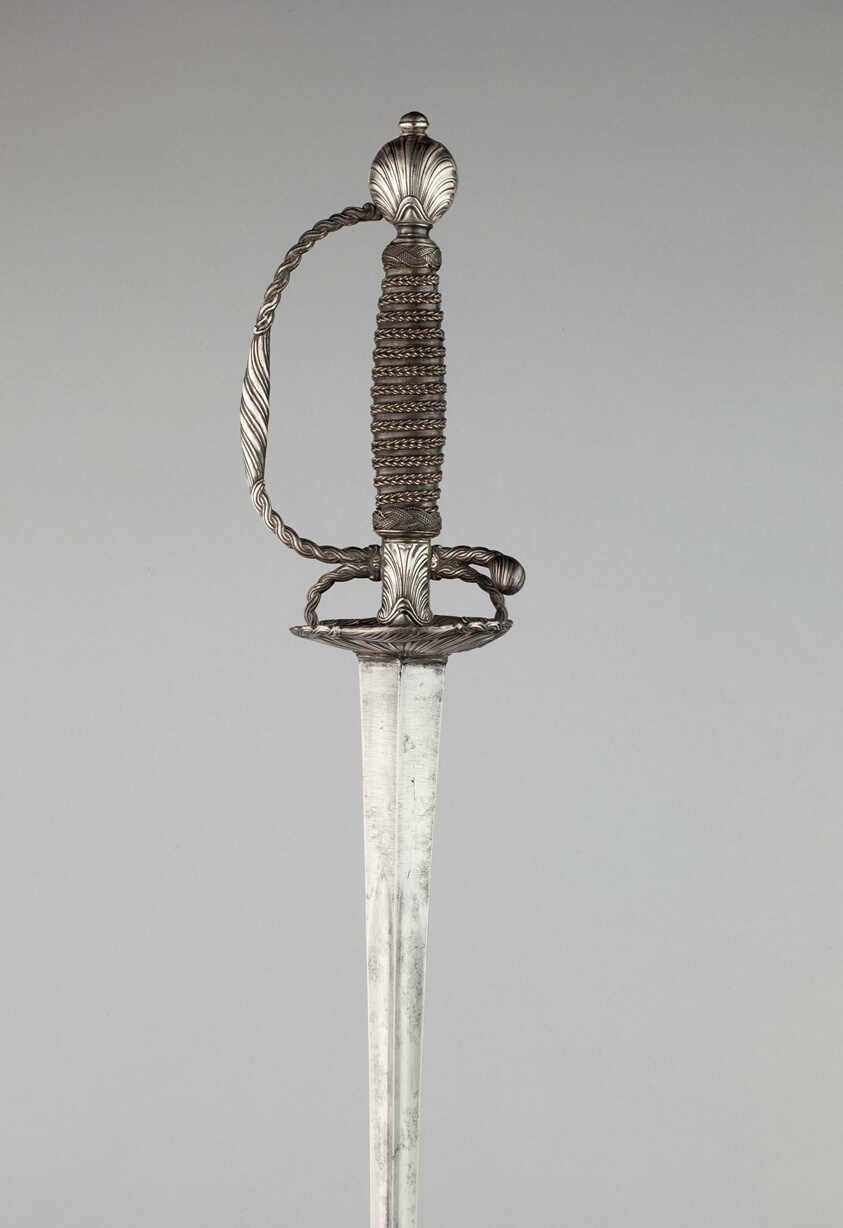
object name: Arms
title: Smallsword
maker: French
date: c. 1770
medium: Steel, iron, silver, and wood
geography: France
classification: edged weapon-sword; arms; arms and armor